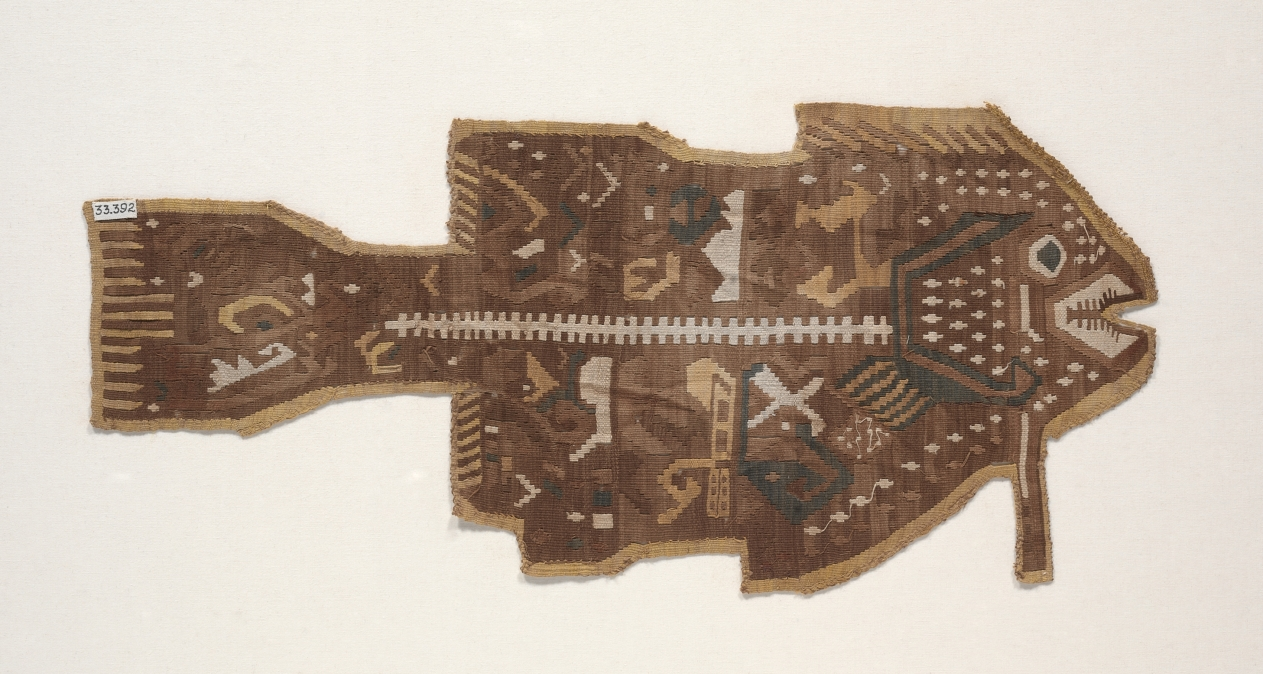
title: Fish-Shaped Applique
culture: Central Andes, Central Coast, Ychsma (Pachacamac) people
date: 1400–1532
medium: cotton and camelid fiber, tapestry weave with areas of eccentric weft floats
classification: Textile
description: This fish-shaped textile was originally stitched with others like it to a mantle, a shawl-like garment that was a staple of Andean clothing. Its partial “X-ray view,” which emphasizes the bony spine, is unique to the style of the Ychsma (yeach-mah), who lived on Peru’s central coast. In addition to referencing sources of food, marine subjects may also carry religious associations, as some coastal peoples of the period regarded the sea as a deity.